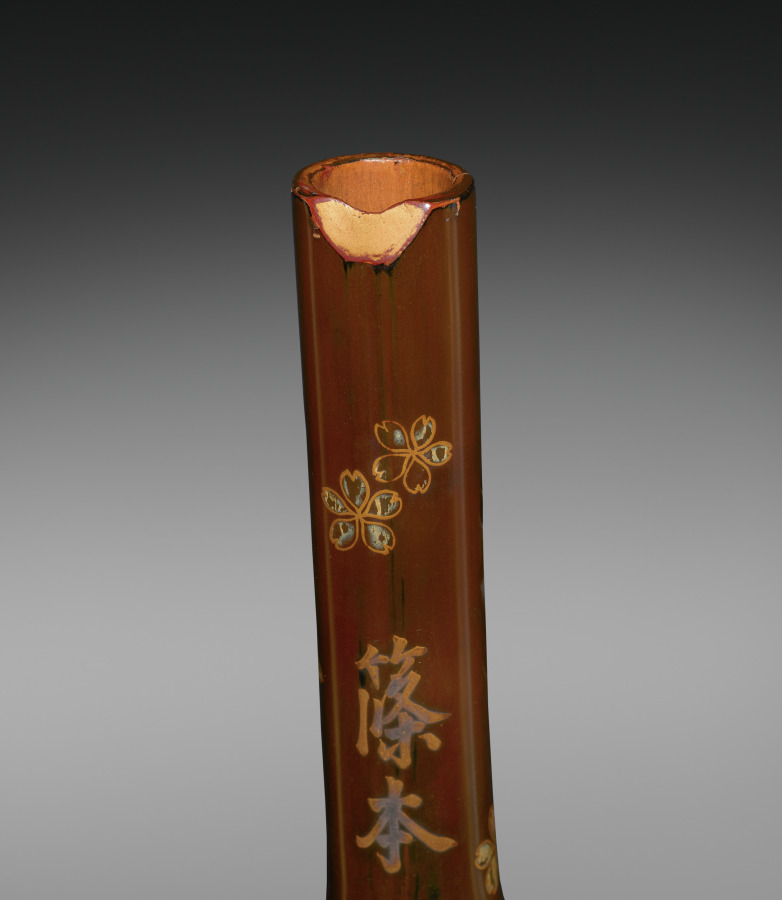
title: End-blown Flute (Hitoyogiri)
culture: Japan, Meiji period (1868–1912)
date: late 1800s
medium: Lacquered bamboo with gold and silver maki-e (sprinkled powder designs)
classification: Musical Instrument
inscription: 篠本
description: The hitoyogiri 一節切 is considered one type of shakuhachi 尺八 bamboo flute and was popular in the 16th and 17th centuries. It is smaller and of weaker sound than the better known fuke 普化, and was thus known as a "small bamboo" or kotake 小竹, during a brief 19th-century revival. The node of the bamboo is positioned between the four finger holes on the front, and the thumb hole at the top of the back. This one has a design of cherry blossoms and scattered petals.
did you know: The name of this flute, hitoyogiri 一節切 comes from the fact that it has a single node in the bamboo from which it is made.